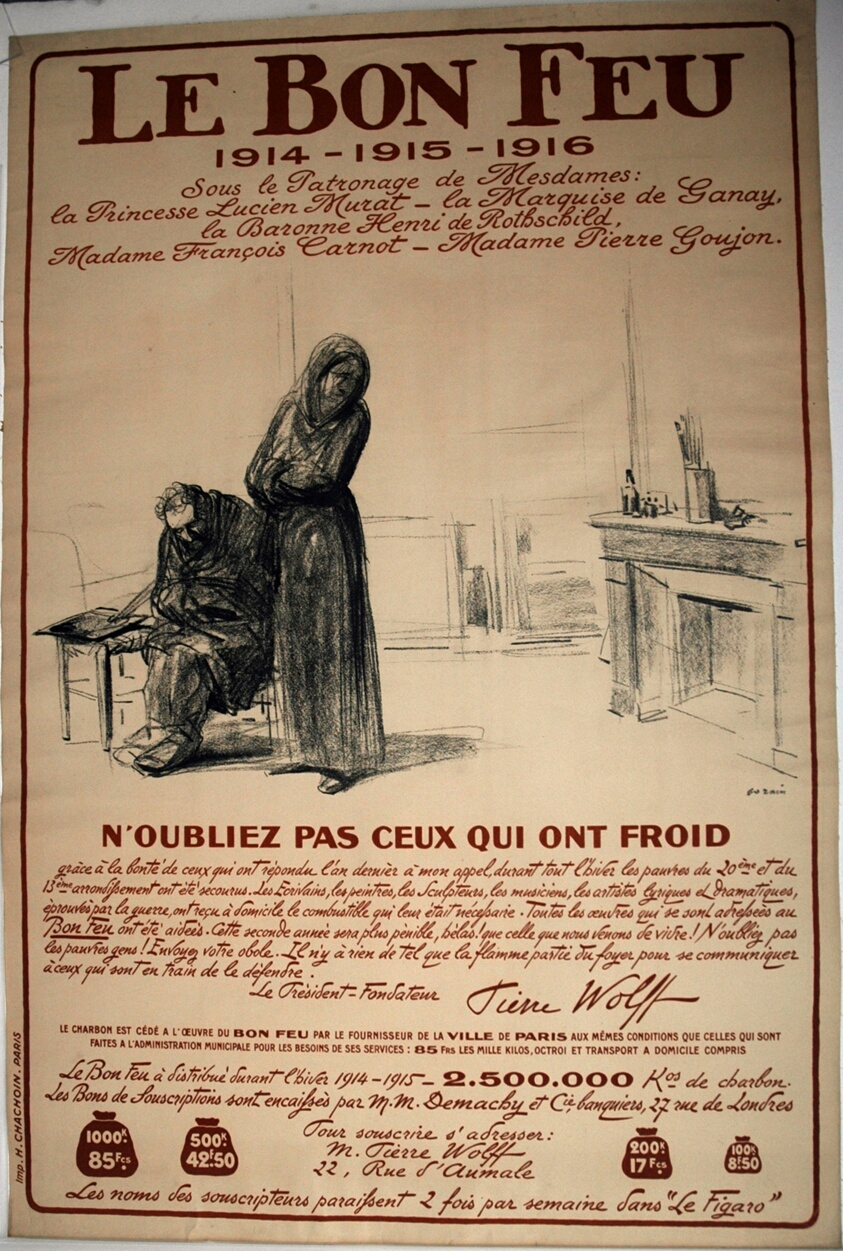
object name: Print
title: The Good Fire - Remember those who are cold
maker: Jean Louis Forain (French, 1852-1931); Printed by Imprimerie H. Chachoin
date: c. 1916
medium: Color lithograph on cream wove paper laid down on linen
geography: France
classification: lithograph; print; prints and drawing